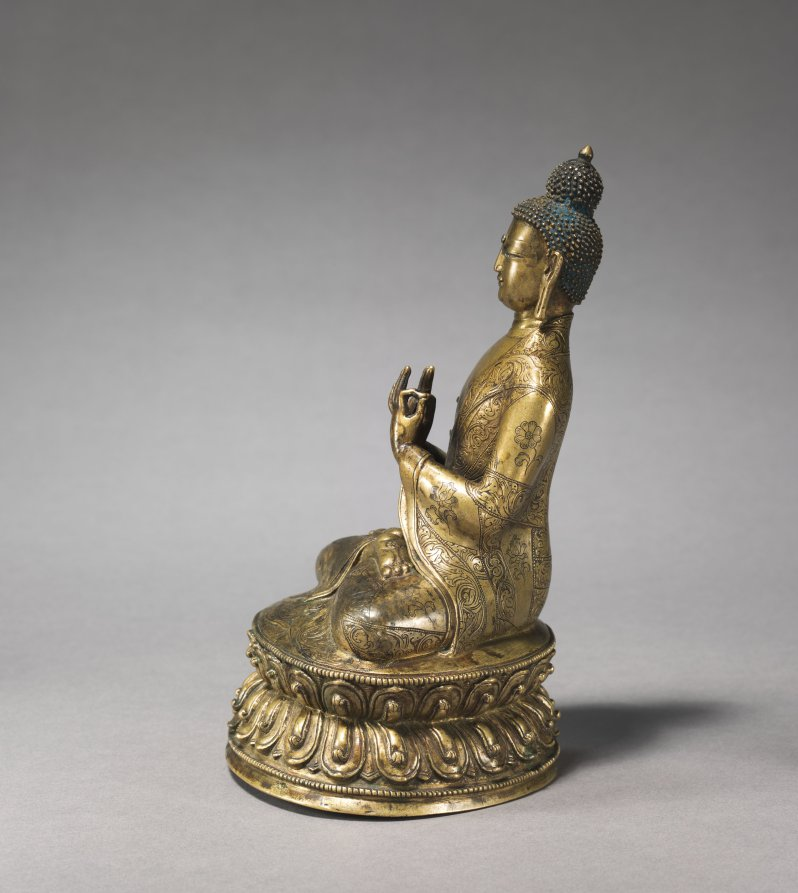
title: Seated Maitreya Buddha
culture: Western Tibet, Yongle Period (1403-1424)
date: c. 1400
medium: bronze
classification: Sculpture